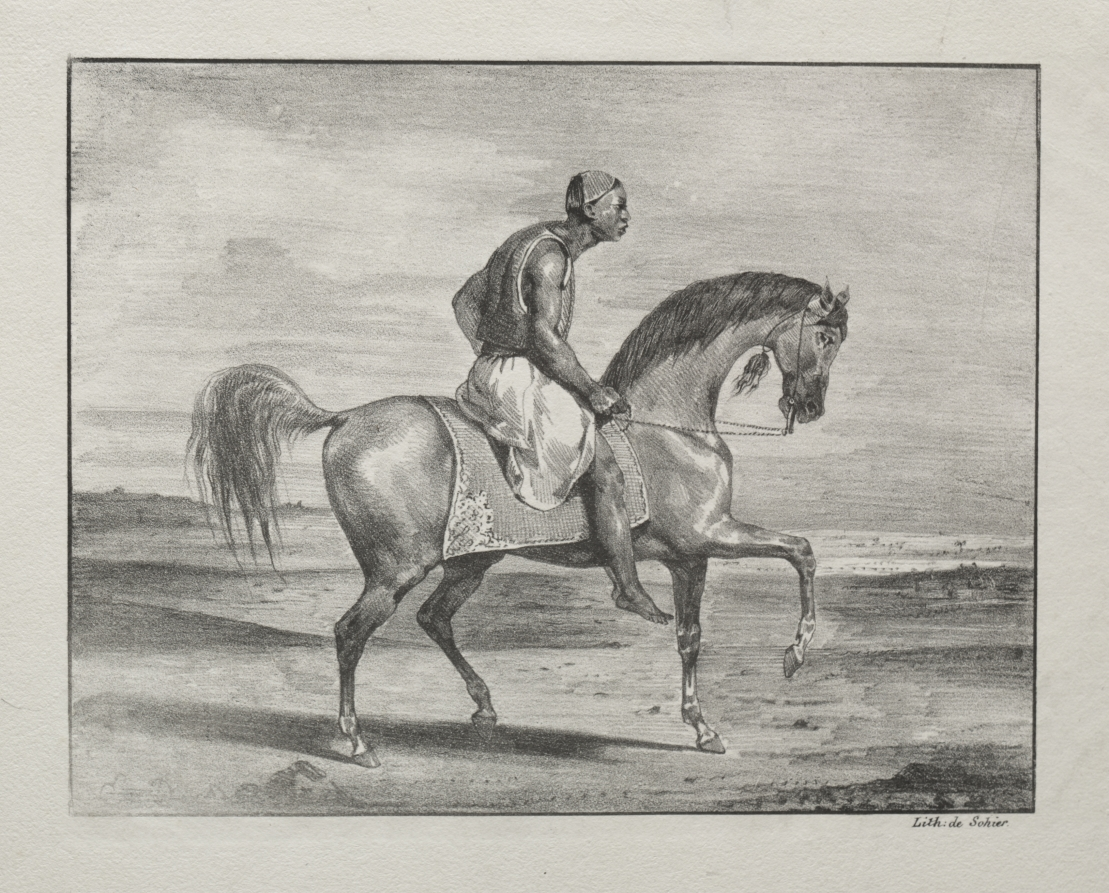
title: African on Horseback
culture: France, 19th century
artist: Eugène Delacroix (French, 1798–1863)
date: 1823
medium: lithograph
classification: Print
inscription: signed, lower left, in stone: E. Delacroix; lower right margin, printed: Lith de Sohier